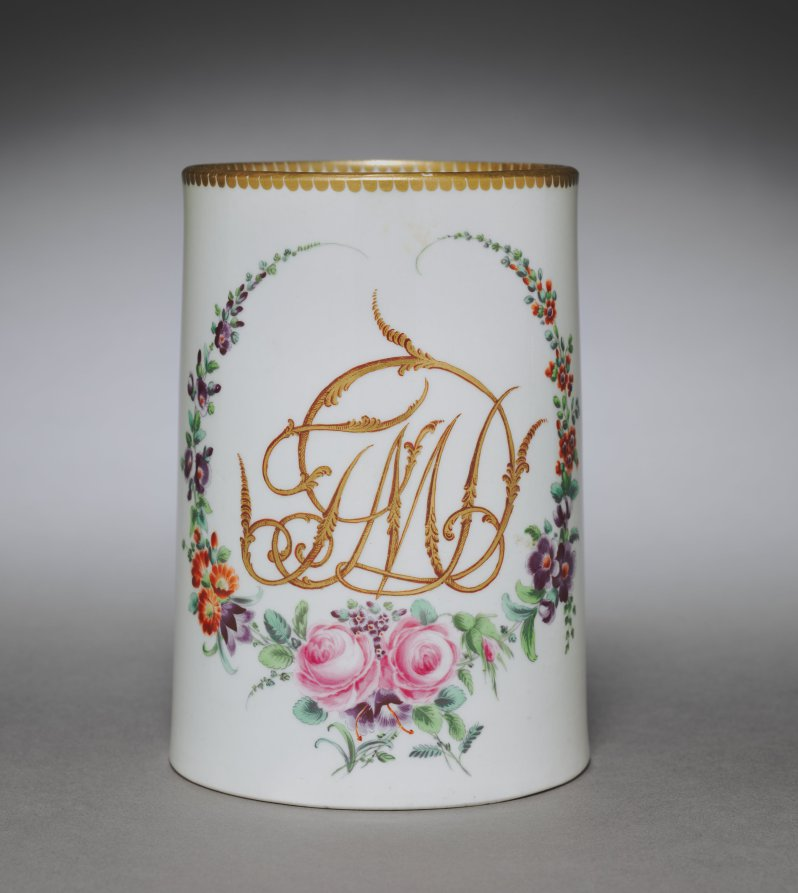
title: Cann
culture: England, 18th century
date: c. 1770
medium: ceramic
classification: Ceramic